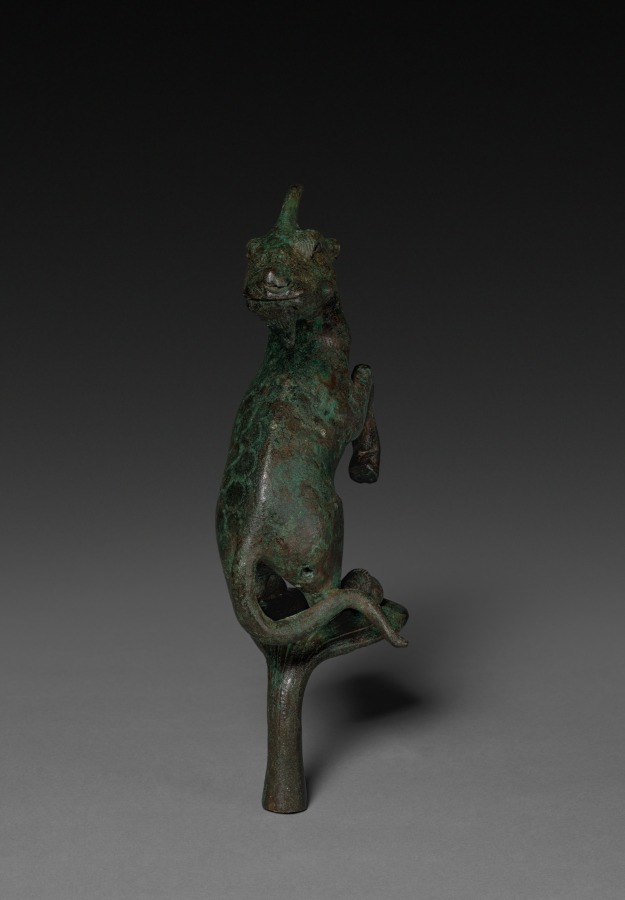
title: Mythical Animal: Tianlu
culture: China, Northern Song dynasty (960-1127)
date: 960–1127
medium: bronze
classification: Sculpture